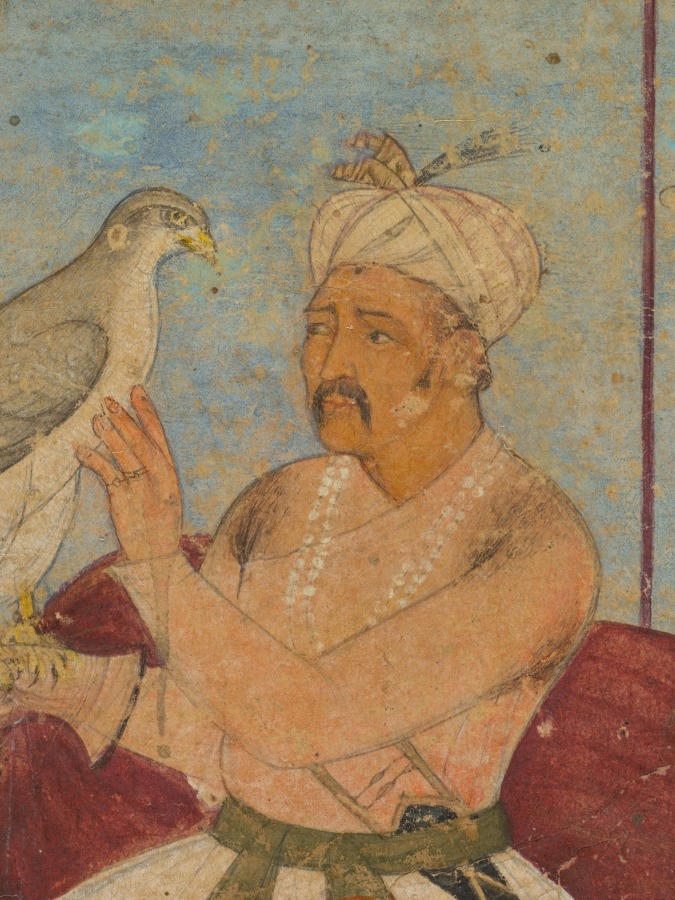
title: Akbar and Jahangir Examine a Ghir Falcon while Prince Khusrau Stands Behind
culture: Mughal India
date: c. 1602–4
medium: gum tempera and gold on paper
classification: Painting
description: Emperor Akbar sits against a purple bolster under a canopy looking aged and careworn, probably not long before his death. He examines a trained falcon of the type that the Mughals used in hunting. This falcon appears to be from Akbar’s son, Prince Salim, who stands before him in a gesture of gift-giving. A stately black antelope, a wild animal now a pet, harnessed and wearing a bell, crouches at the foot of the steps leading up to the canopied platform.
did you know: Salim rests his hand on a sharply pointed dagger in a red velvet sheath.